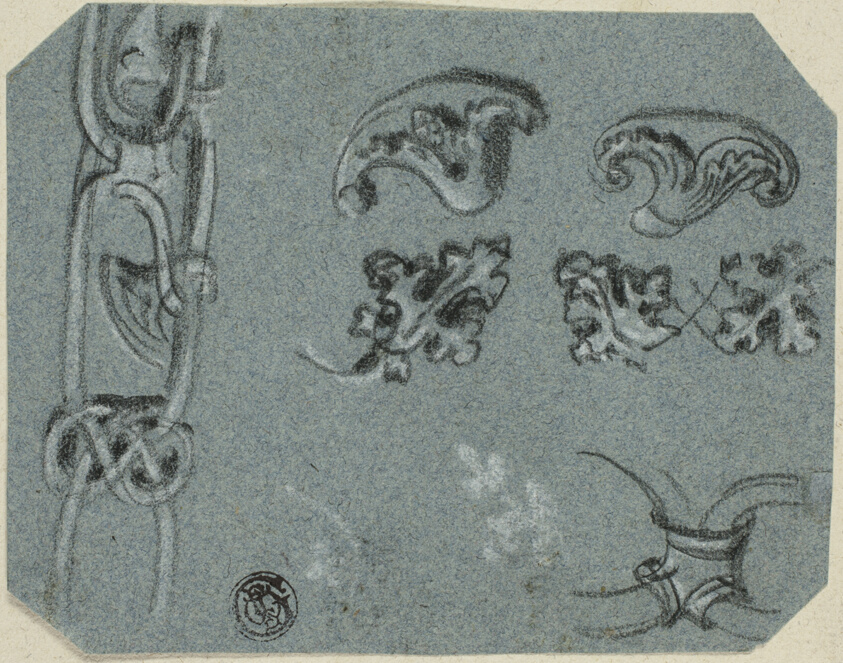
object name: Drawing and Watercolor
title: Sketches of Decorative Architectural Details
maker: Unknown Artist; British, 19th century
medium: Black chalk, with white chalk, on blue laid paper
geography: United Kingdom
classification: chalk; drawings (visual works); prints and drawing; paper